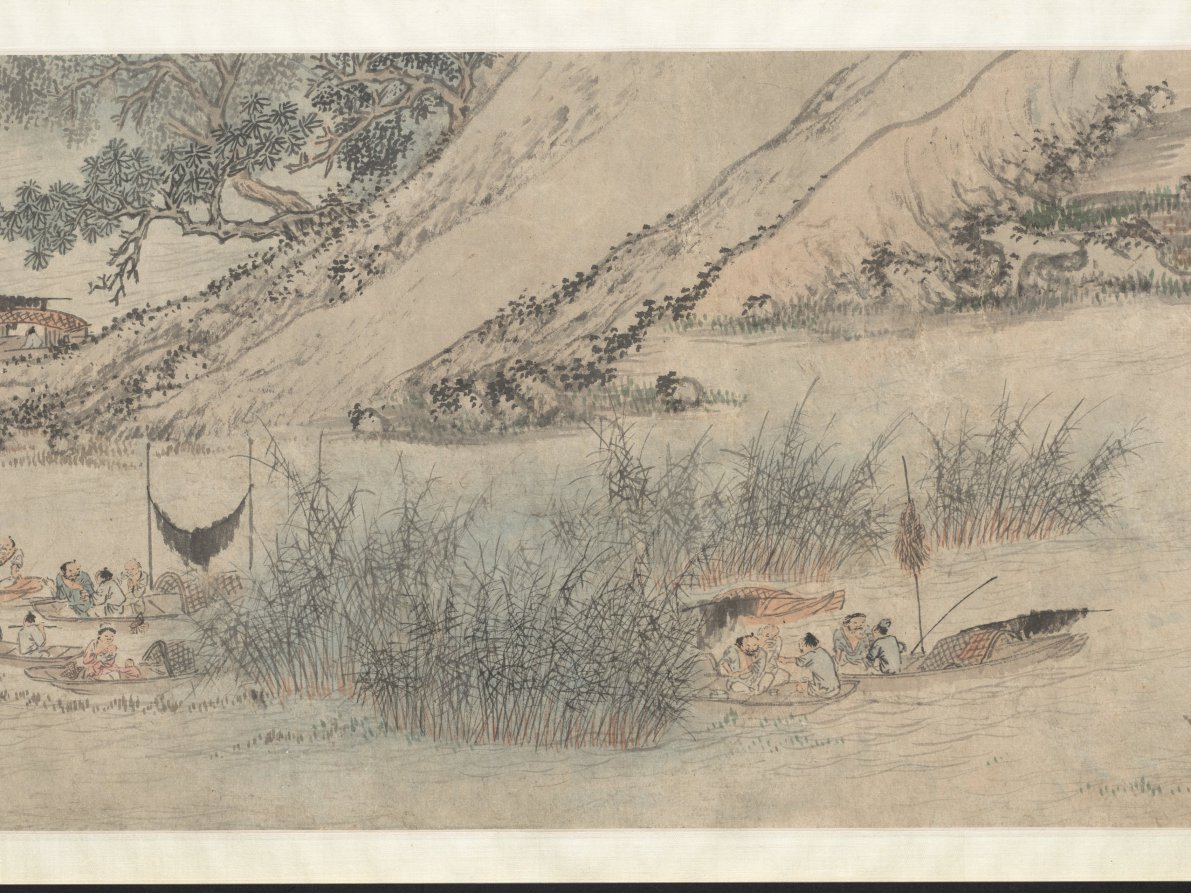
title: Fisherman's Joy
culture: China, Ming dynasty (1368–1644)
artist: Qian Gu (Chinese, 1508–c. 1578)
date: 1572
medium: Handscroll; ink and light color on paper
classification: Painting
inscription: Artist's inscription, signature, and seal: On the autumn day of the jen-shen year [1572], P'eng-ch'eng, Ch'ien Ku painted [this]. [seal] Hsüan-ch'ing shih. 2 colophons, both dated 1689, and 5 additional seals of Yün Shou-p'ing (1633-1690).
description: This painting has a scene showing two small crafts, each manned by two fishermen, practicing a traditional fishing method. In one of them, a man uses a bamboo pole to direct the movements of a cormorant bird sent into the water. Cormorant fishing, witnessed in some areas of the lower Yangzi River, appears in Zhe school paintings. Qian Gu may have borrowed these narrative figure scenes from Zhe school paintings, while his vantage point, brushwork, and soft tones align with the Wu school style. Scenes of fishermen appealed to urban and educated audiences who idealized the self-sufficient independence of fisherfolk.